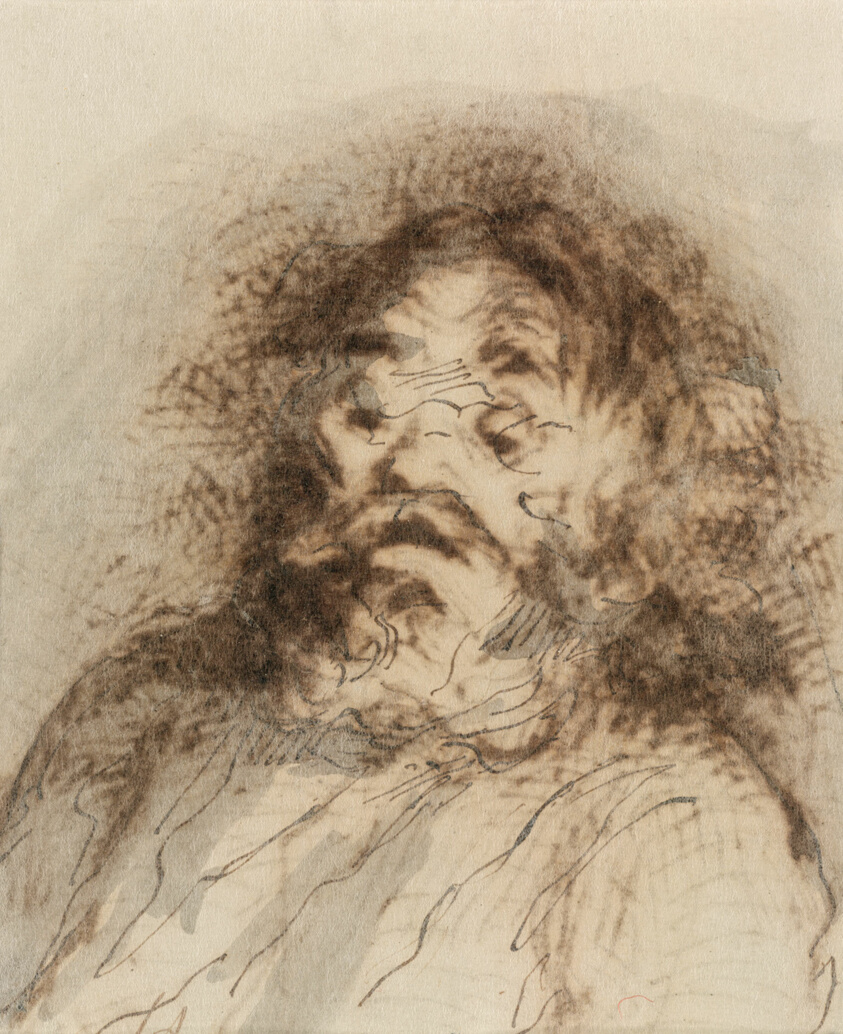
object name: Drawing and Watercolor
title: Bearded Man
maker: Honoré Victorin Daumier; French, 1808-1879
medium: Pen and brown iron gall ink on cream wove paper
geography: France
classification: prints and drawing; pen and ink drawings; drawings (visual works)